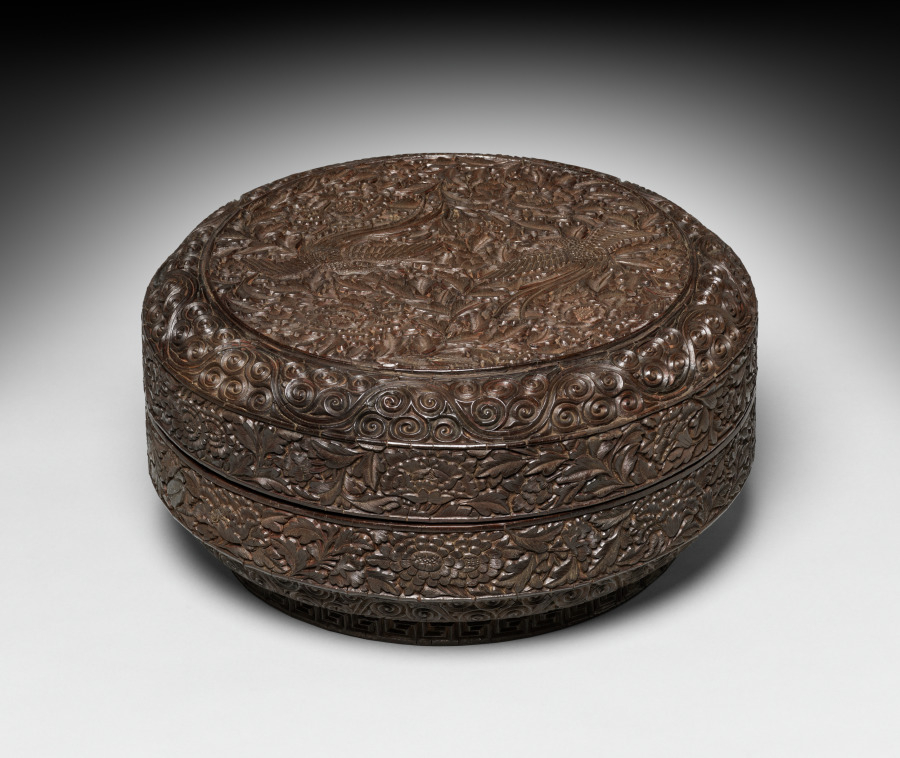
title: Round Box with Bird and Peonies Design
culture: China, late Southern Song (1127–1279) to early Yuan dynasty (1271–1368)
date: c. 1300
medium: carved lacquer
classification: Lacquer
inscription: 山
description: The carved lacquer box and lobed silver container nearby both feature pairs of birds and flowers on their covers. There is a striking similarity in decoration, shape, and aesthetic appeal. Both boxes suggest that successful designs and shapes circulated among craftsmen, workshops, and beyond regional borders.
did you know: Lacquer ware was always a valuable product in Chinese material culture and was often used as precious gifts in diplomatic, religious, and economic exchanges with other countries—Japan, for example, where this box was long preserved and acquired.